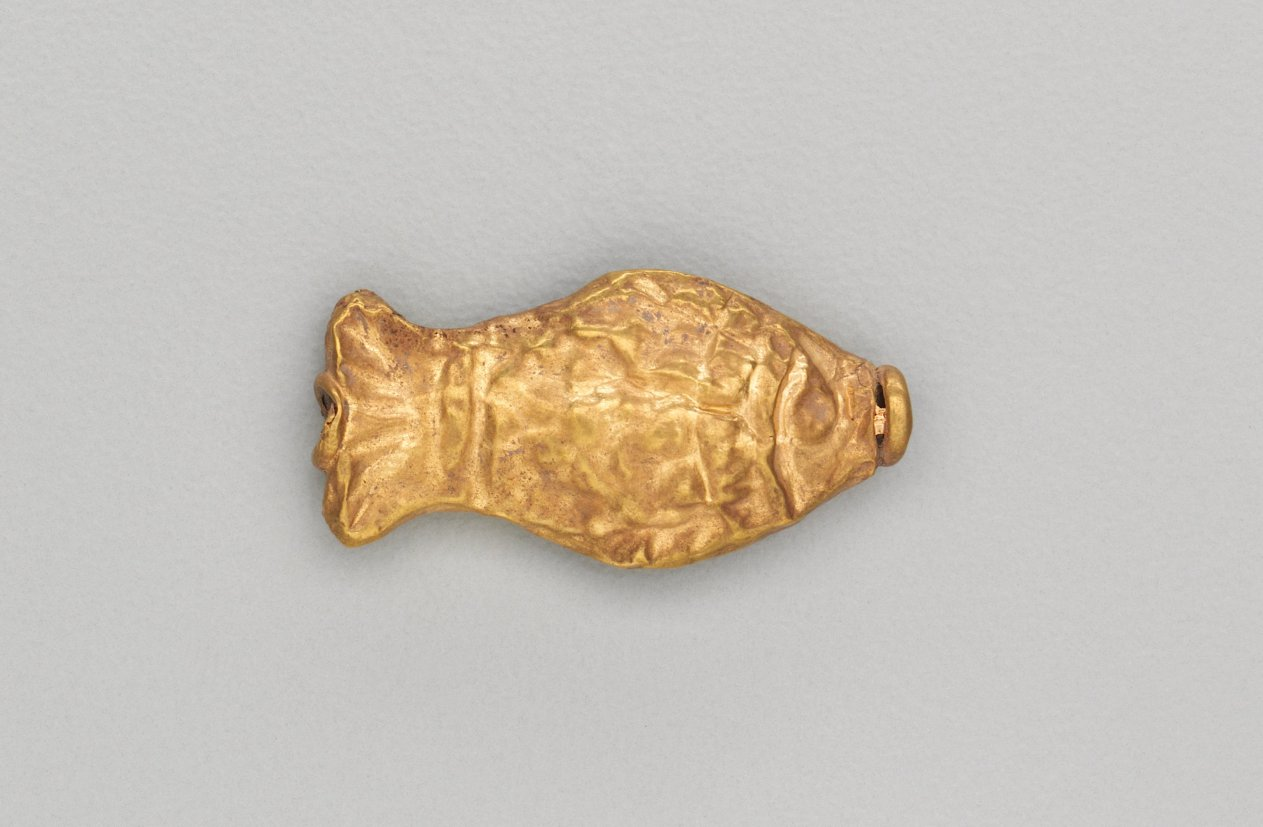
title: Necklace Bead in the Form of a Fish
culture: India, Shunga period (185–78 BCE)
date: 185–72 BCE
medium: gold repoussé with granulation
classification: Jewelry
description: Jewelry in ancient India often consisted of elements associated with water, such as fish and other aquatic plants and animals. Since water is essential for life, imagery that connotes water is life-affirming, or auspicious, and therefore appropriate adornment.